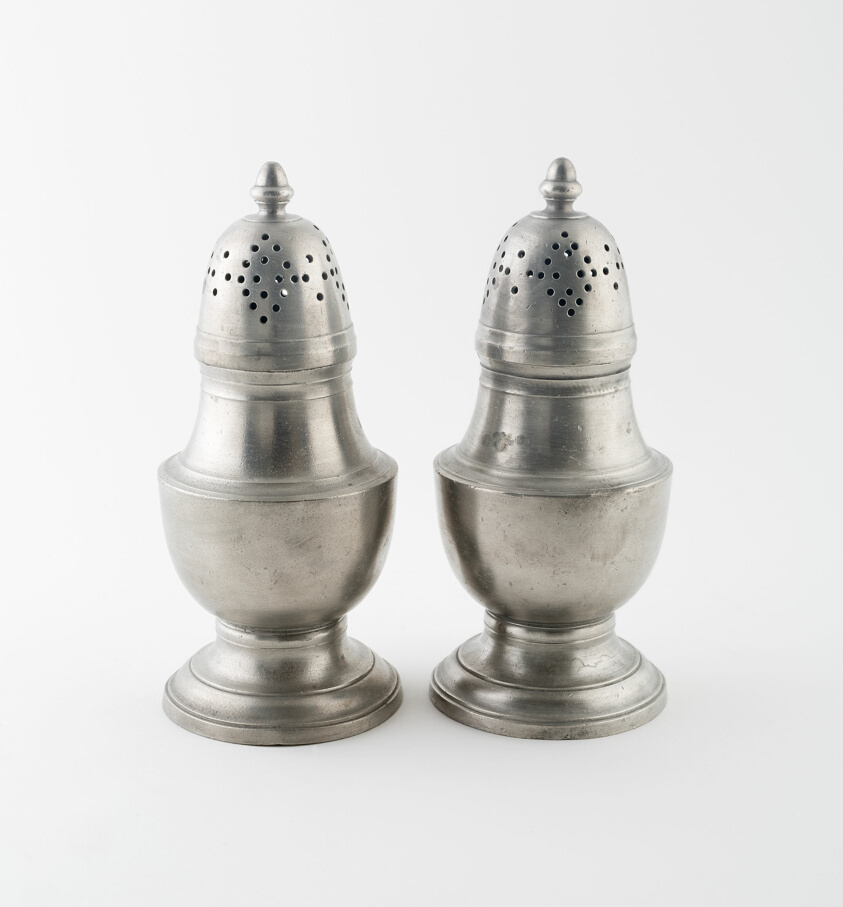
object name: Metalwork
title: Pair of Casters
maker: Probably Germany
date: Late 18th century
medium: Pewter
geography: Germany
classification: pewter; metalwork; european decorative arts